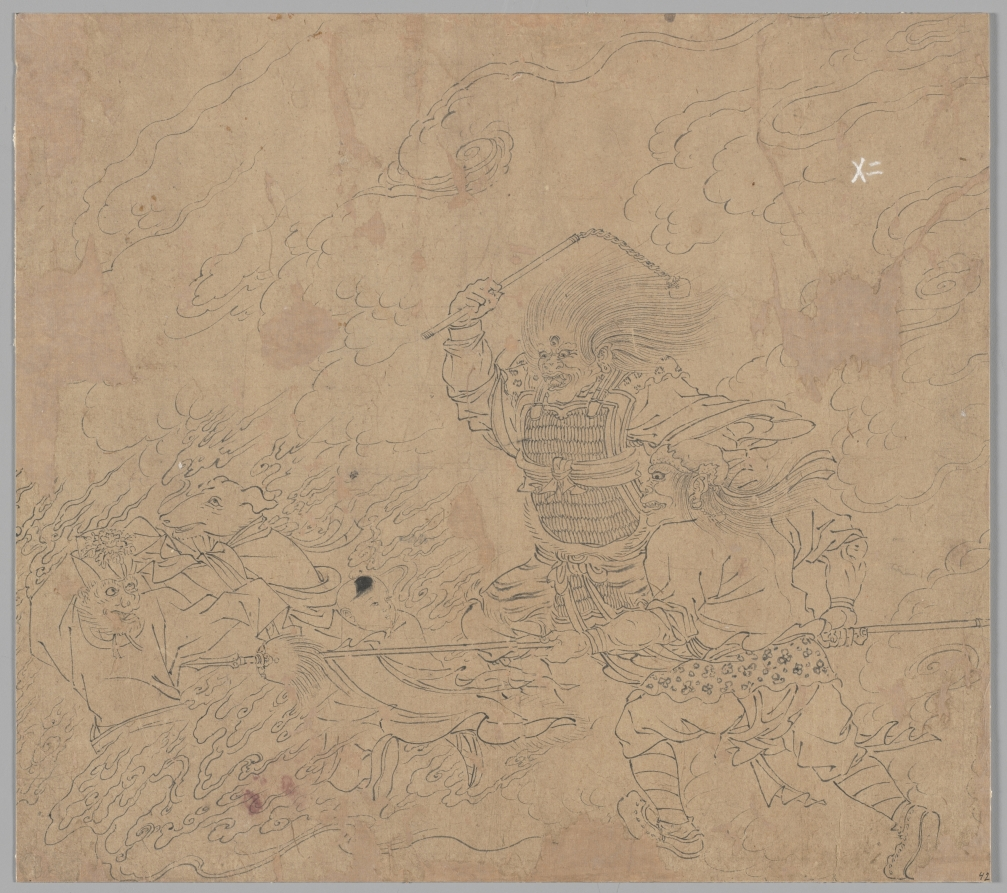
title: Album of Daoist and Buddhist Themes: Search the Mountain: Leaf 42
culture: China, Southern Song dynasty (1127-1279)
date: 1200s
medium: Album, ink on paper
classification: Painting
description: This extraordinary album has 50 paintings on a variety of religious subjects. They were likely created by several master craftsmen to share with studio apprentices as models for fulfilling commissions. The Jade Emperor and the Daoist pantheon make up the first 26 leaves. The next 14 leaves portray the Buddhist Ten Kings of Hell administering punishments to the dead. The third section, called “Clearing the Mountains,” features divine soldiers, led presumably by the deity Erlang Shen 二郎神, fighting undesirable creatures.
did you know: Part-human part-animal figures surrounded by flames are chased by two demon-soldiers, one wielding a whip or club and the other a spear.